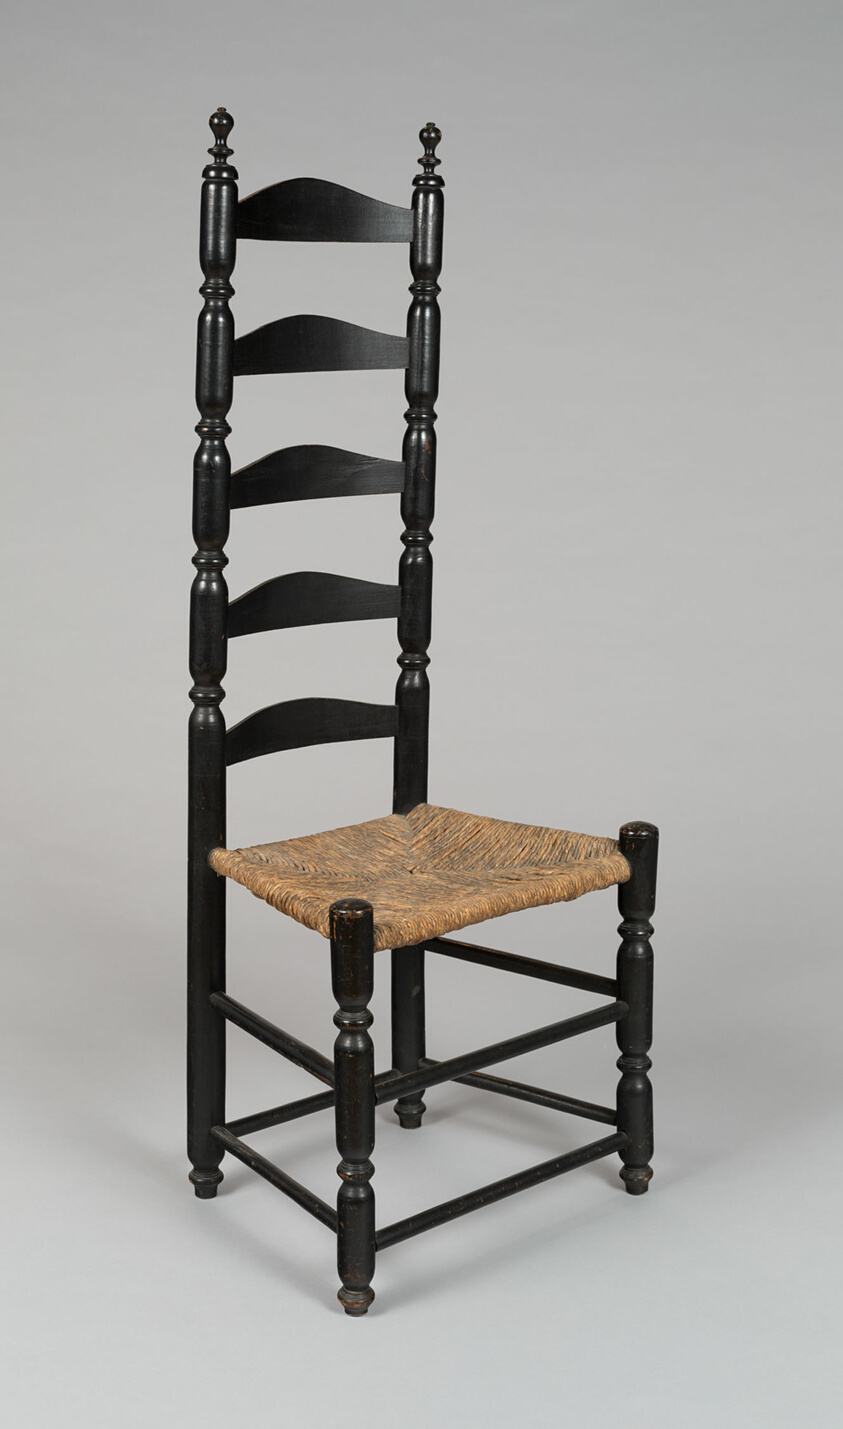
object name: Furniture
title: Side Chair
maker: Artist unknown (American, 17th–18th century); New England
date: 1691–1790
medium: Maple and ash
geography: New England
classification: seating; furniture; american decorative arts; american arts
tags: furniture